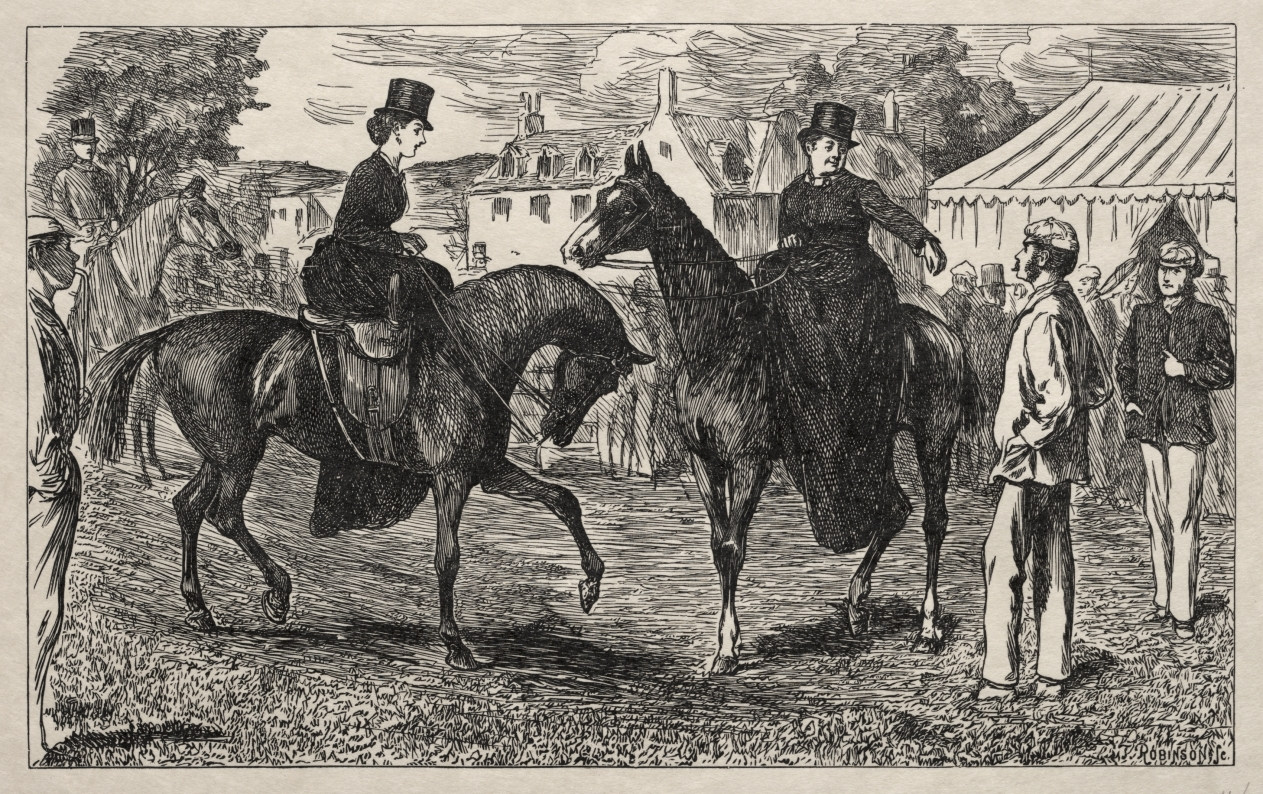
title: Why the Pifflers Lost their Return Match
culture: England, 19th century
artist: George Louis Palmella Busson Du Maurier (British, 1834–1896)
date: 1865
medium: wood engraving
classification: Print